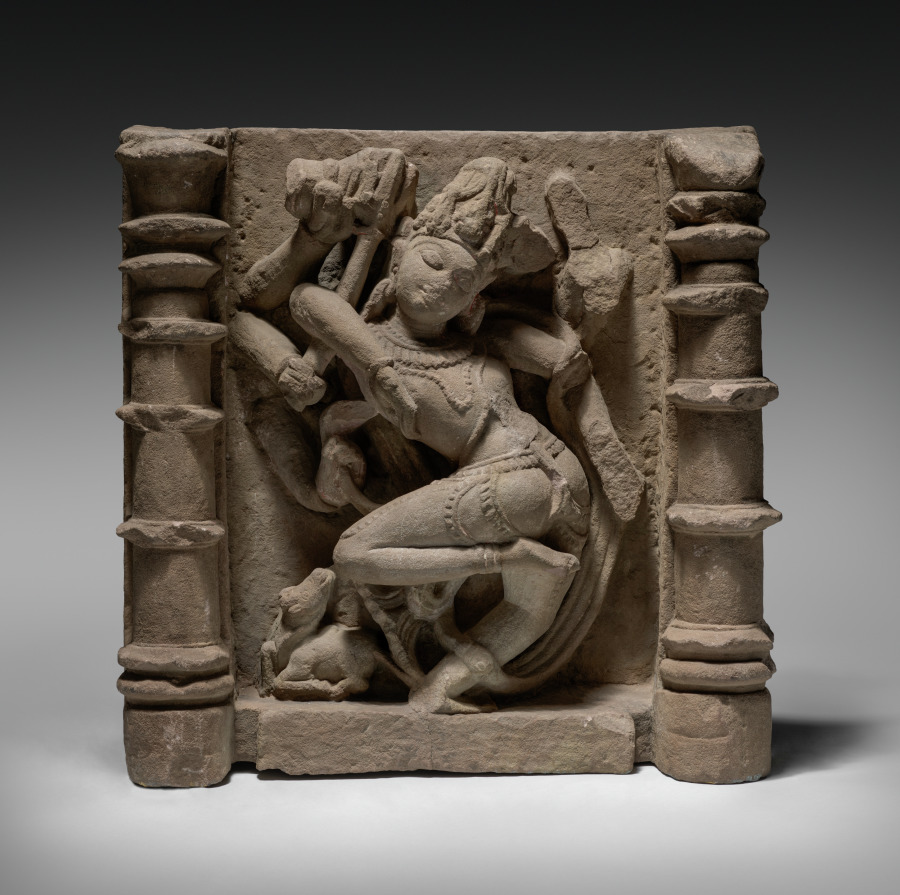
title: Eight Armed Shiva Dancing Between Two Pillars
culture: India, Rajasthan, Chandela Dynasty, 10th - 11th century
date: 900s–1000s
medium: sandstone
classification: Sculpture